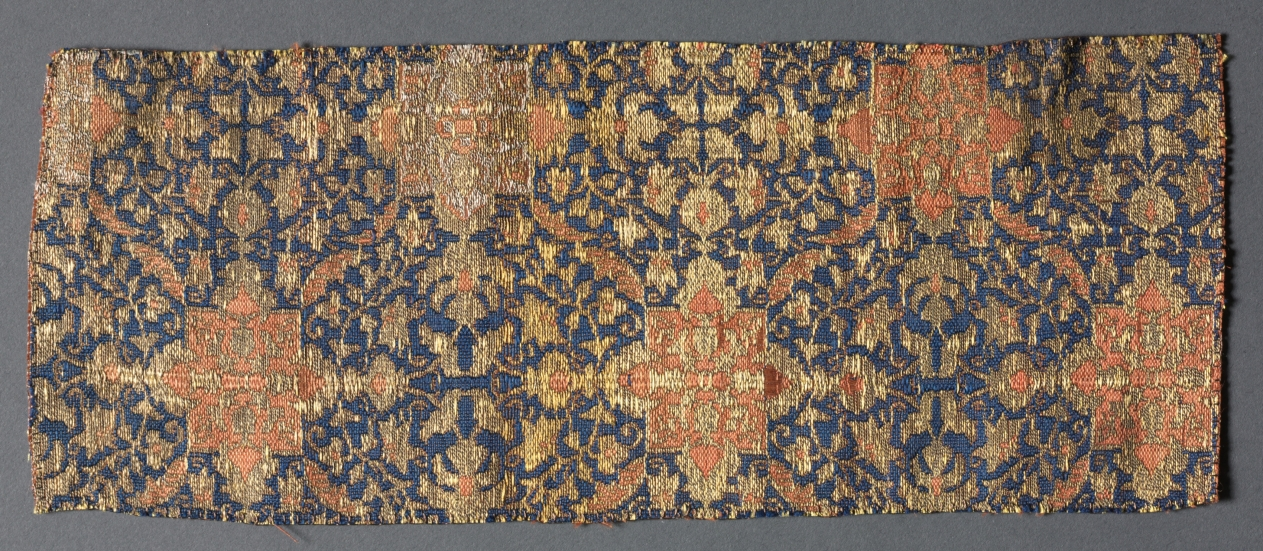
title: Fragment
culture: Iran, 17th century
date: 1600s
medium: compound tabby weave; silk and metallic thread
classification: Textile